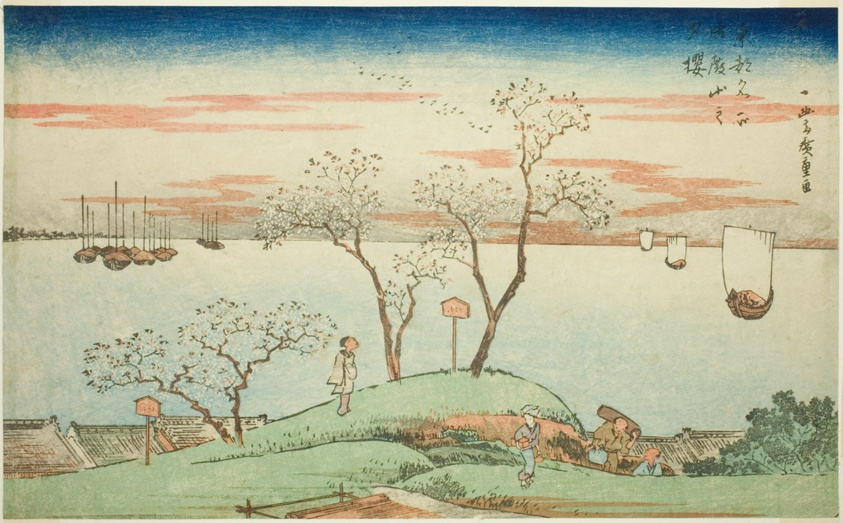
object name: Print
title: Evening Cherry Blossoms at Goten Hill (Gotenyama no yuzakura), from the series "Famous Views of the Eastern Capital (Toto Meisho)"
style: Japanese (culture or style)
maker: Utagawa Hiroshige 歌川 広重; Japanese, 1797-1858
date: c. 1831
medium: Color woodblock print; oban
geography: Japan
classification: woodblock print; print; asian art